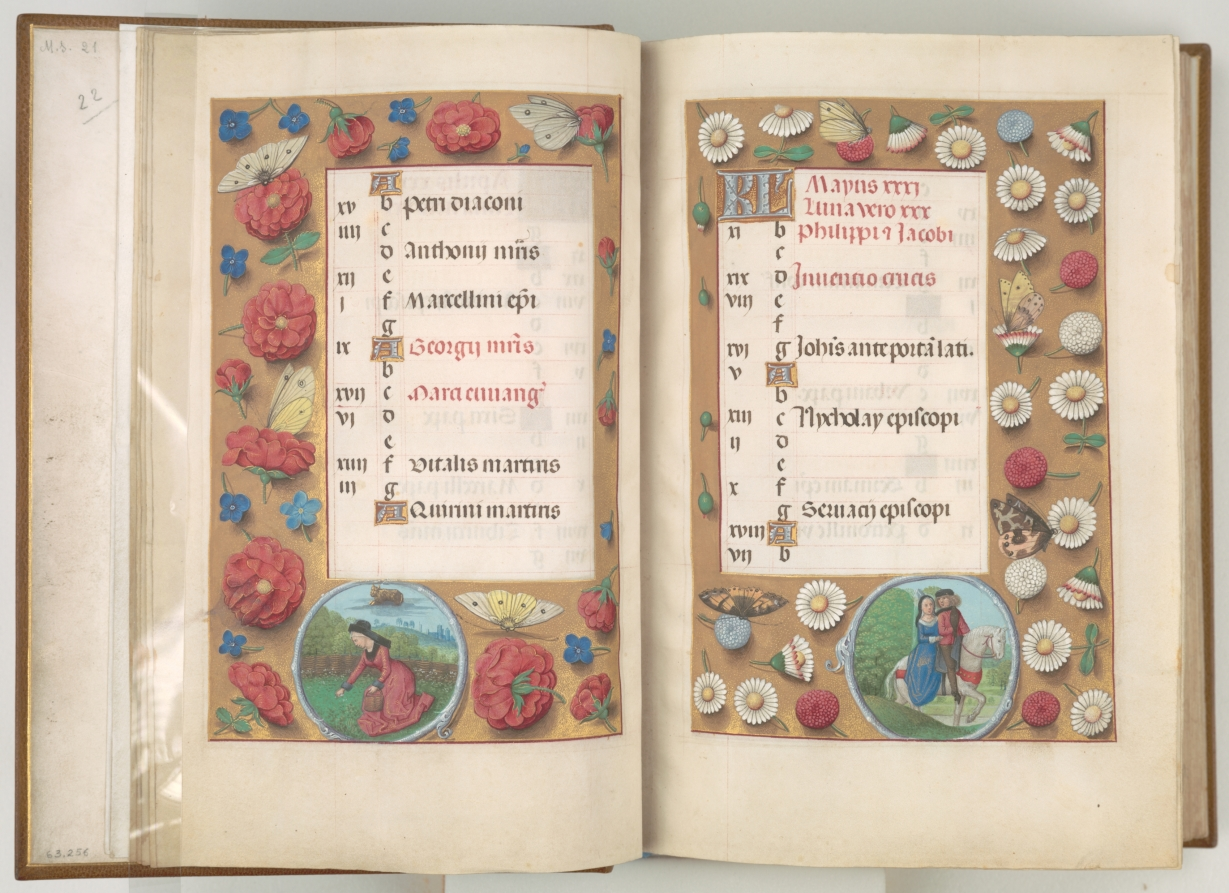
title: Hours of Queen Isabella the Catholic, Queen of Spain: Fol. 5v, April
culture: Flanders, Ghent and Bruges, late 15th century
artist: Master of the First Prayerbook of Maximillian (Flemish, c. 1444–1519)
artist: and Associates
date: c. 1500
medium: ink, tempera, and gold on vellum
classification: Bound Volume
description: This manuscript was illuminated by a circle of at least five highly organized manuscript painters active in the Flemish cities of Ghent and Bruges. The principal illuminator was Alexander Bening, who painted the majority of the book's miniatures. Manuscripts produced by this circle of artists are renowned for the decoration of their borders, which typically feature a rich variety of realistically painted flowers, birds, and butterflies. This prayer book, called a book of hours, was intended not for a cleric but for the private devotions of a lay person—in this case, Isabella the Catholic, Queen of Spain (1451–1504); her coat of arms embellishes the book's frontispiece. It is unlikely that the book was commissioned by the Queen herself; rather, she probably received it as a diplomatic gift from someone courting her patronage, perhaps Cardinal Francisco Jimenez de Cisneros. A Franciscan friar, Jimenez was dependent upon Isabella for his advancement, first to the post of Queen's confessor in 1492, and then to Archbishop of Toledo in 1495.